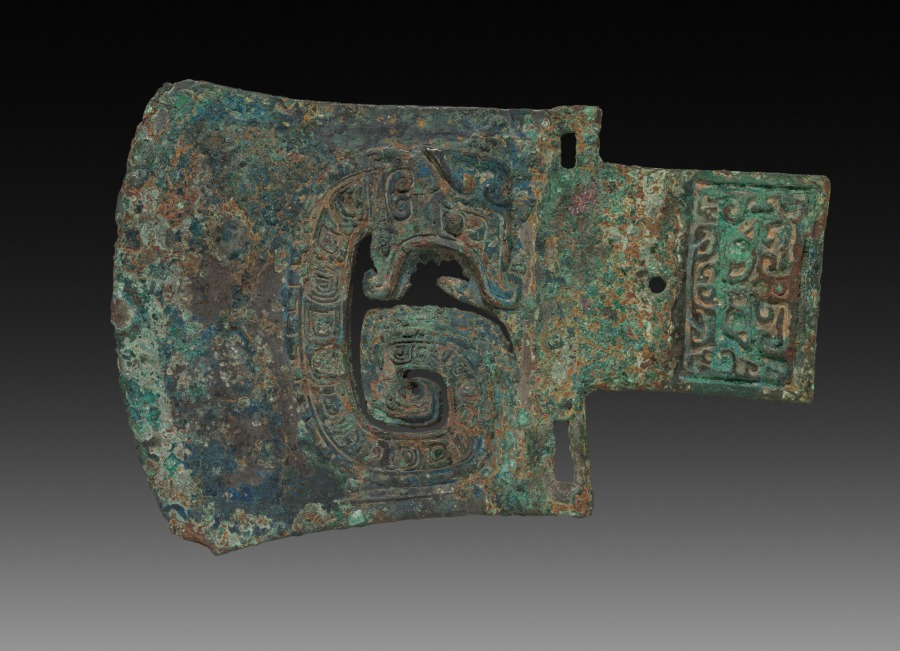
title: Axe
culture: China, Shang dynasty (c. 1600–c. 1046 BCE)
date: 1766–1045 BCE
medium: bronze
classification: Metalwork